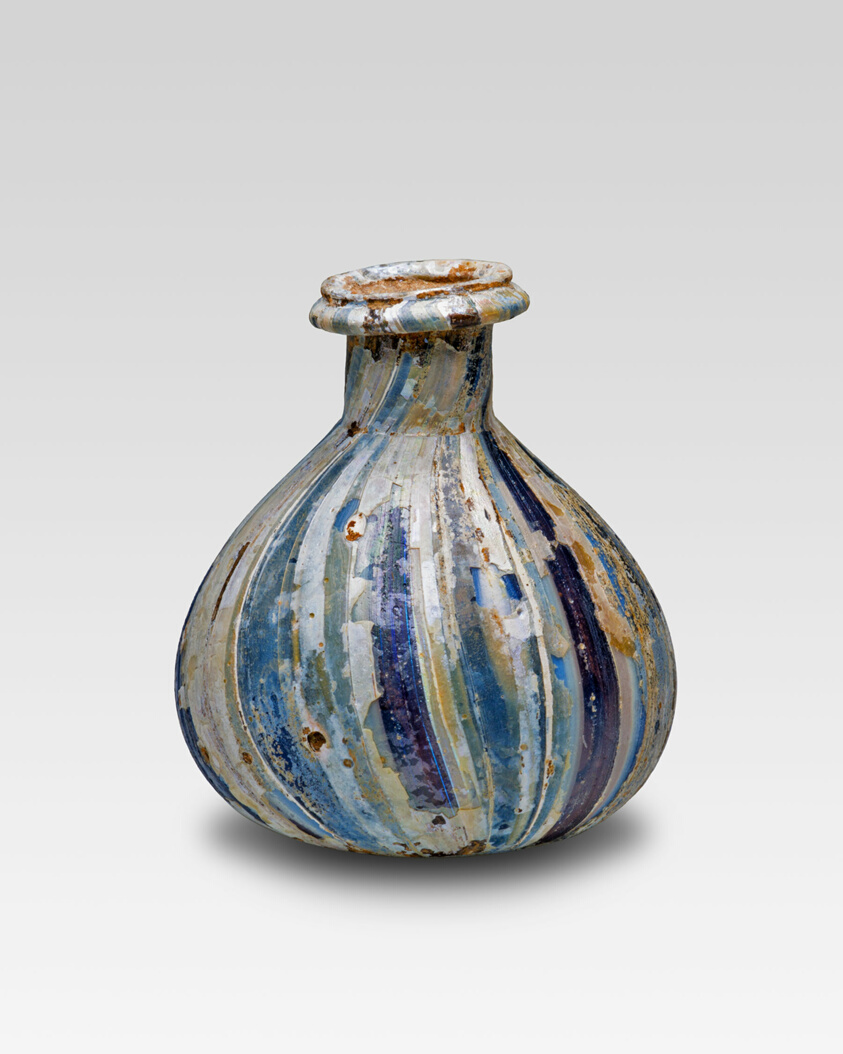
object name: Vessel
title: Bottle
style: syrian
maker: Roman; probably Italy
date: first half of the 1st century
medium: Glass, blown technique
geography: Syria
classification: bottle; glass; vessel; ancient art